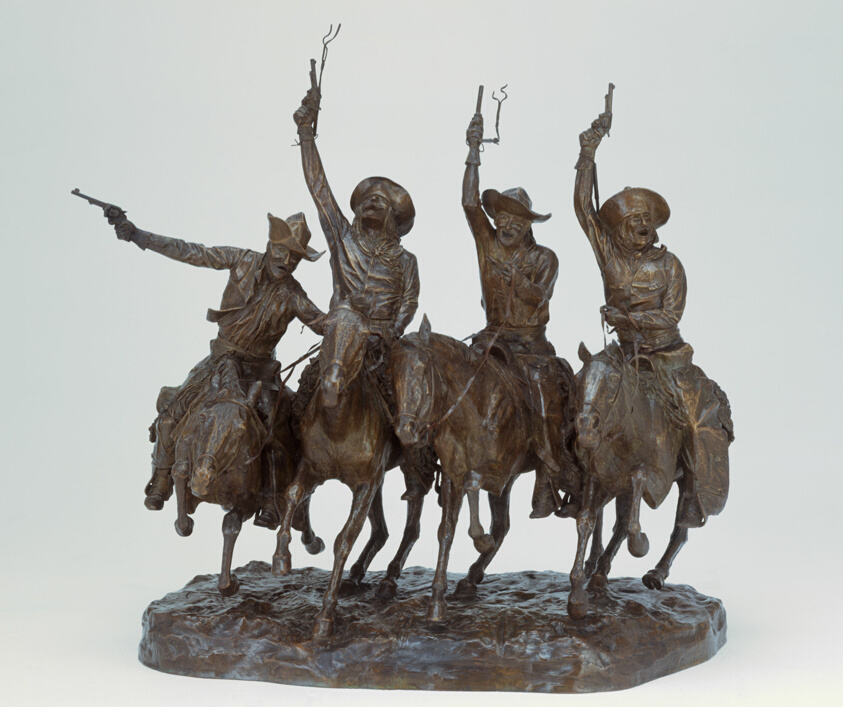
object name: Sculpture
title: Coming Through the Rye (Over the Range)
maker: Frederic Remington (American, 1861–1909); Cast by Roman Bronze Works (American, founded 1897)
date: Modeled 1902, cast in bronze 1902–6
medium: Bronze with brown patina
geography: New York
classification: sculpture; american arts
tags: animals, people, portraits